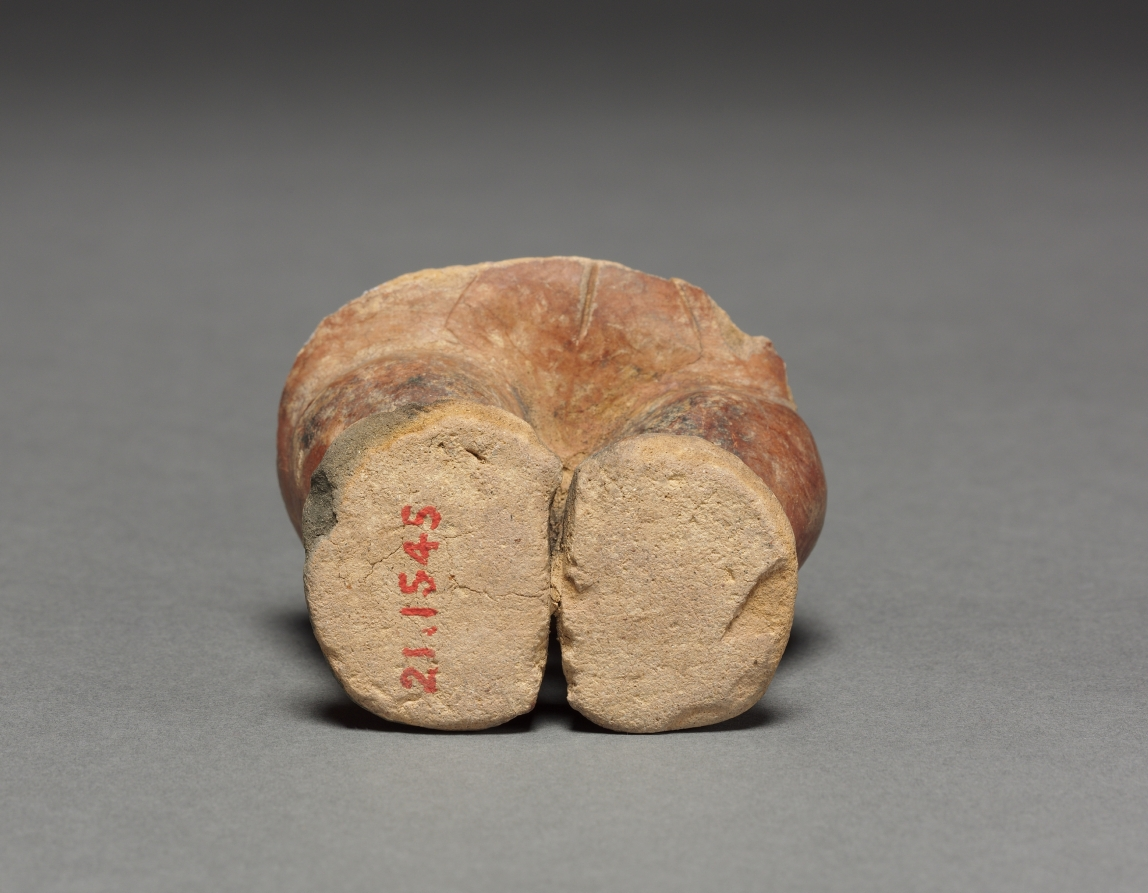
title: Jar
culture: Colombia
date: before 1550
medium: black ware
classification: Ceramic